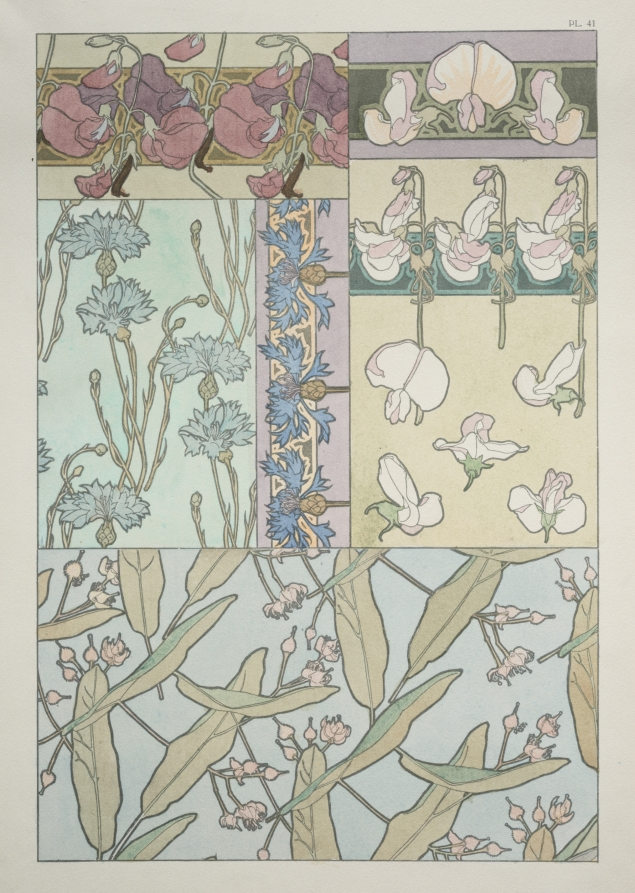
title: Documents Decoratifs: Sweet Peas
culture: Czechoslovakia, late 19th-early 20th century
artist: Alphonse Mucha (Czech, 1860–1939)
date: 1901–2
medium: lithograph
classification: Print